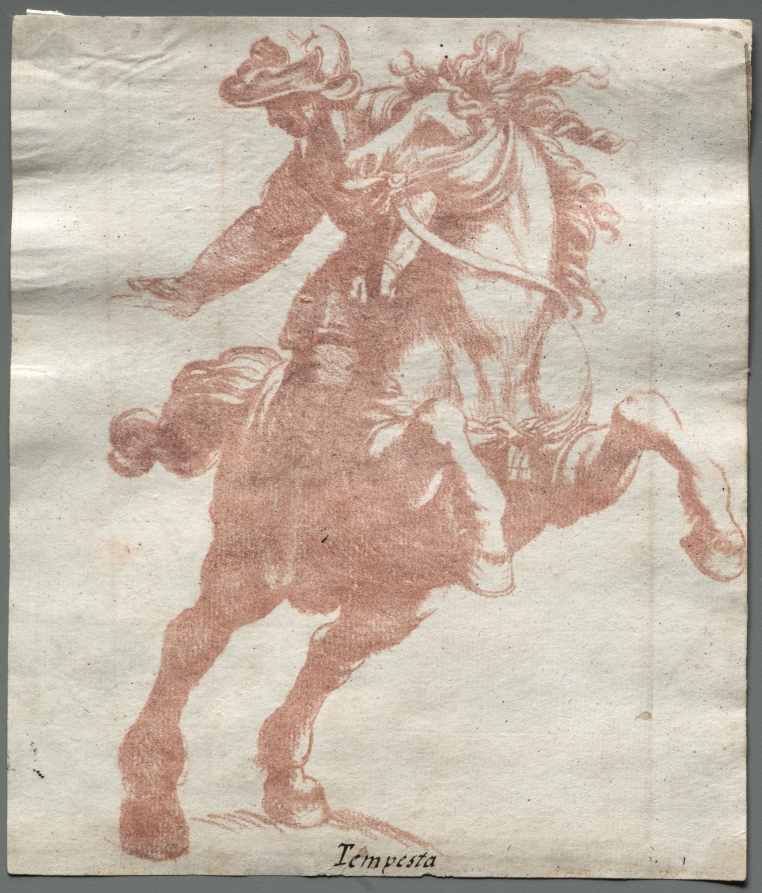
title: Rearing Horse and Rider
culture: Italy, late 16th-early 17th century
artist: attributed to Antonio Tempesta (Italian, 1555–1630)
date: c. 1600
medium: red chalk counterproof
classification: Drawing